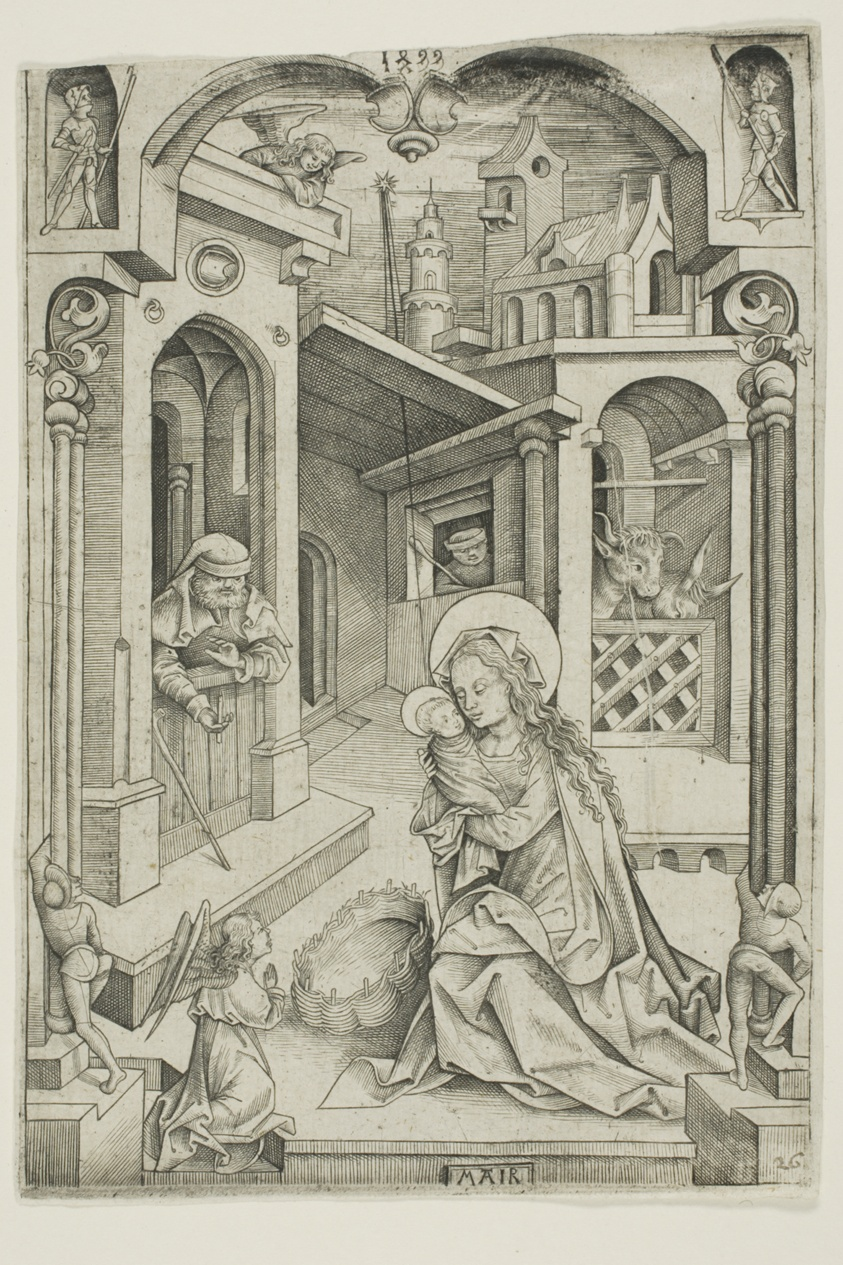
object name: Print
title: The Nativity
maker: Nicolaus Alexander Mair von Landshut (German, died 1520)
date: 1499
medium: Engraving on ivory laid paper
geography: Germany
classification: engraving; print; prints and drawing